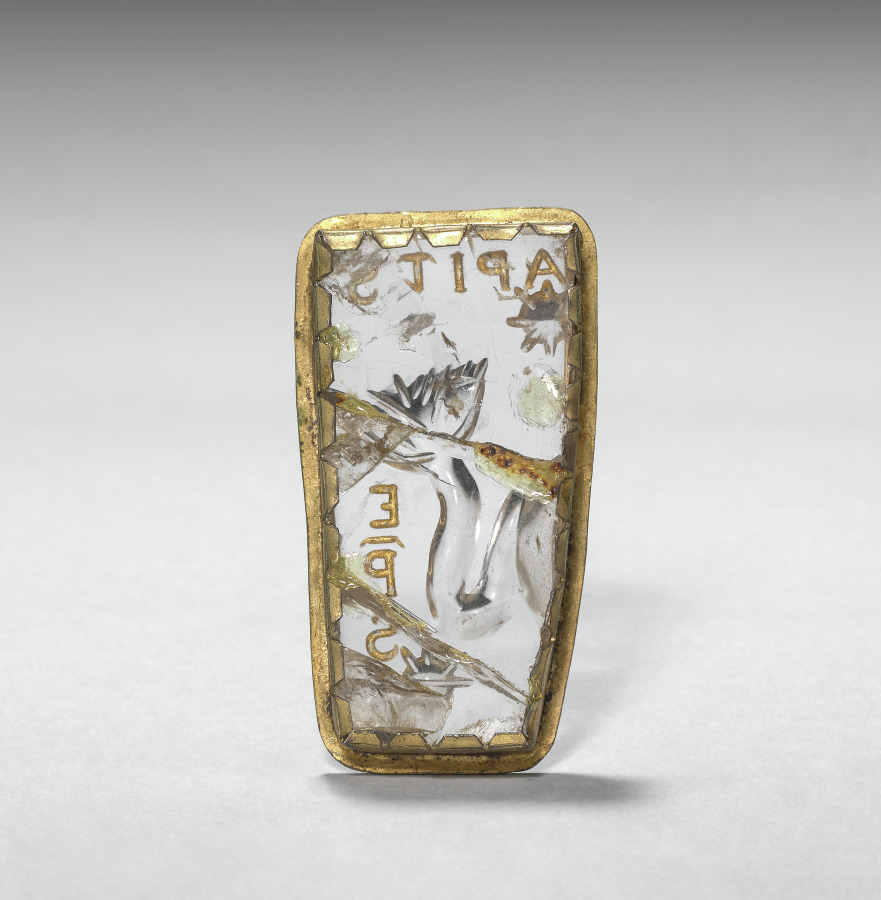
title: Intaglio with the Tail of a Sea Monster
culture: Early Christian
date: 300s CE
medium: rock crystal and gilt silver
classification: Glyptic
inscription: inscribed at top: APITS; at side: EPS.